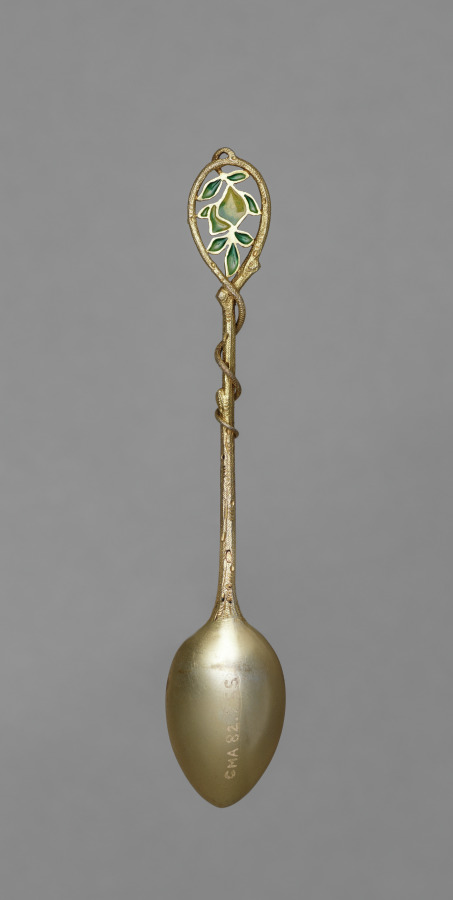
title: Spoon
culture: Austria, Vienna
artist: firm of Georg Adam Scheid (Austrian)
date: c. 1870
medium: silver gilt with plique-a-jour enamel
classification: Silver